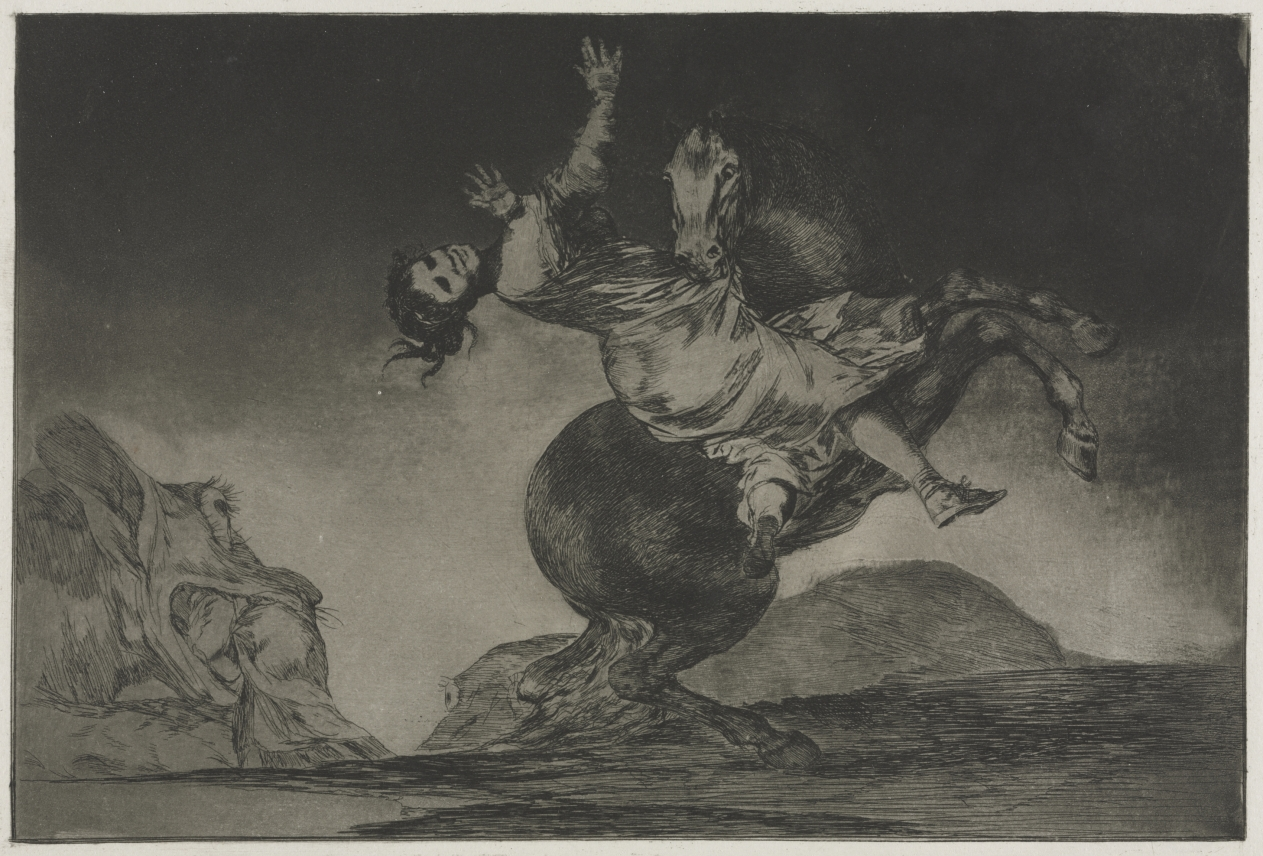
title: The Proverbs: The Horse-Abductor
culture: Spain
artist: Francisco de Goya (Spanish, 1746–1828)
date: 1864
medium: etching and aquatint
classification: Print